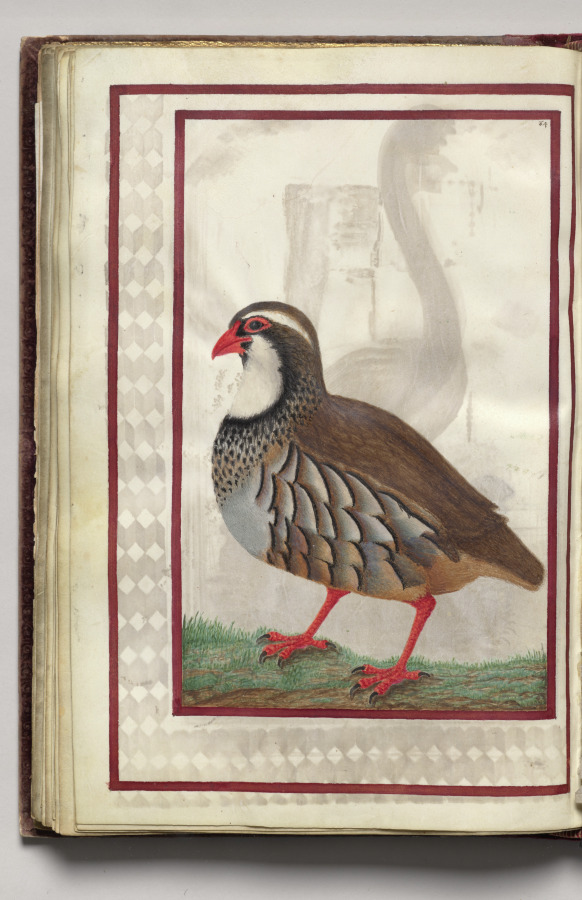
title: Partridge, folio 40 (verso), from Florilegium (A Book of Flower Studies)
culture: France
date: 1608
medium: watercolor, ink, silver and gold over occasional traces of pencil, on vellum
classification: Bound Volume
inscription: Dated: Poitiers 1608 (on frontispiece) Signed: On frontispiece in black ink, lower right: Van Kuyk Notation on drawing: Frontispiece: in pencil, lower margin: * élève de Van Kessel, peintre flammand (* in pencil also appears in front of Van Kuyk's name).